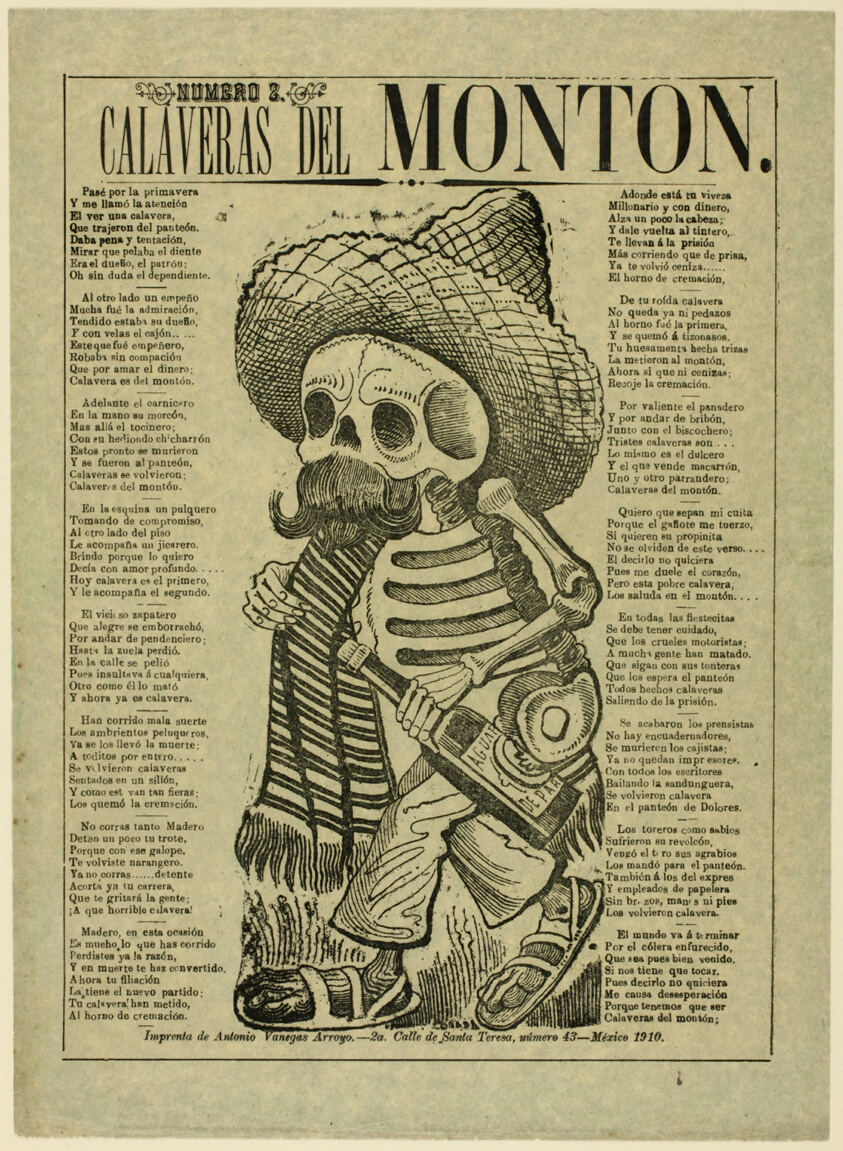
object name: Print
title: Calavera of the Masses, no. 2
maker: José Guadalupe Posada (Mexican, 1852-1913)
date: c. 1910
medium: Photo relief etching with touches of engaving on green wove paper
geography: Mexico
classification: relief etching; print; prints and drawing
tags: text